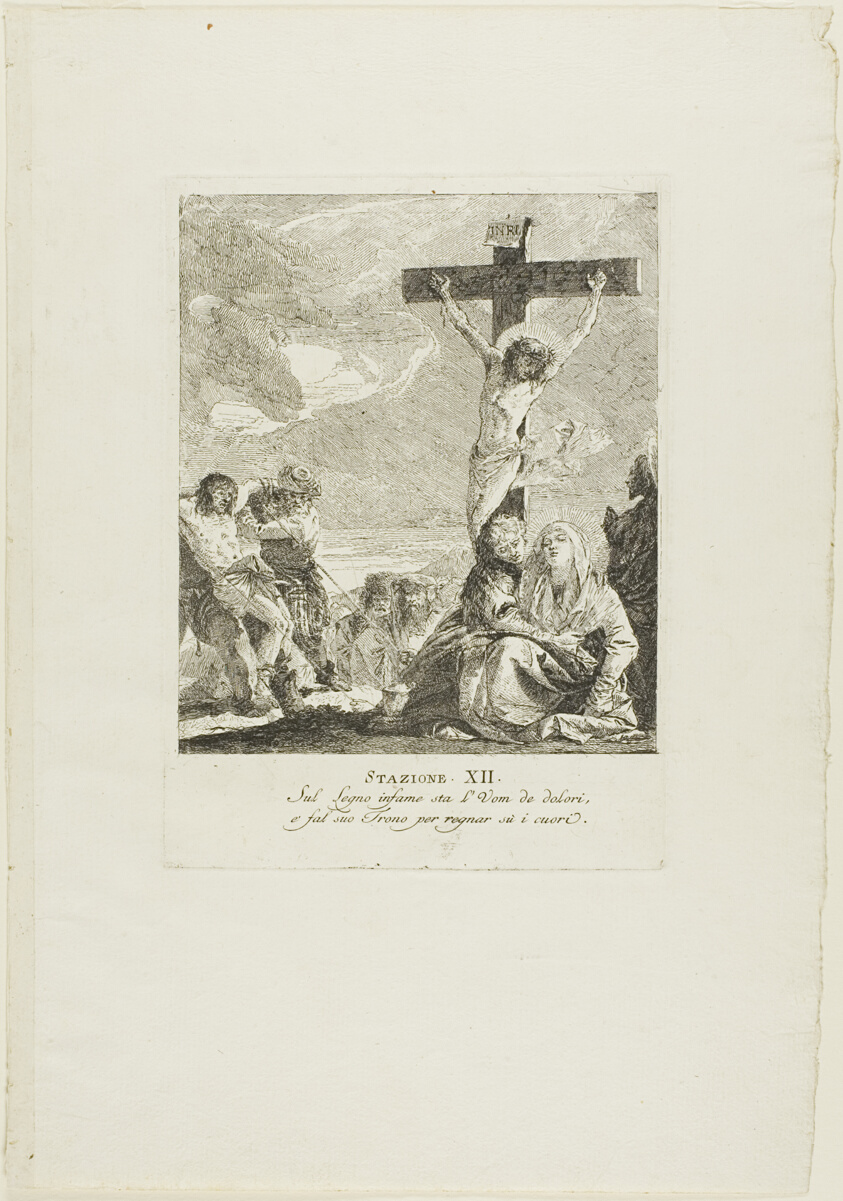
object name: Print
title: The Crucifixion, plate twelve from Stations of the Cross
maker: Giovanni Domenico Tiepolo (Italian, 1727-1804)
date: c. 1748, published 1749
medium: Etching on paper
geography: Italy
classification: etching; print; prints and drawing